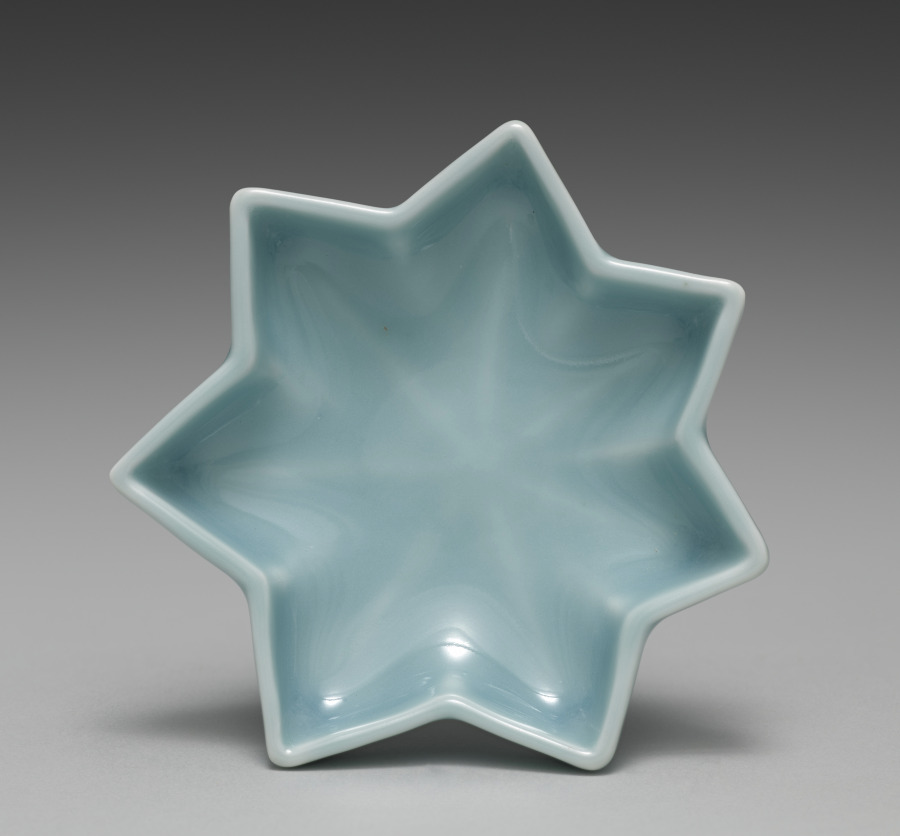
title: Saucer from Maple Leaf-Shaped Saucers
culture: Japan, Meiji period (1868–1912)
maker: Seifū Yohei III (Japanese, 1851–1914)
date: 1893–1914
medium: One of five dishes from a set of ten; porcelain with blue glaze and molded design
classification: Ceramic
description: These maple leaf–shaped saucers, like Yohei III's five shell saucers CMA 2022.188, have a long, horizontal box with a separate compartment for each piece. Now a set of five, these dishes were originally a set of ten, stored in two boxes of five each. From their housings, which accommodate differing numbers of objects, one can hypothesize that while some items created by the Seifu studio were intended to be acquired in larger sets, and thus were perhaps made to order, others, like these, may have been items to be purchased of the shelf in set quantities that allowed clients flexibility in scale. The box for these five saucers describes them as “heavenly blue[–glazed] porcelain” (tenseiji). The veins of the leaves are slightly raised in the clay so that the glaze pools around them and they stand out as white where the glaze thins. There are longer lines at the points of the leaves and shorter ones following the wall of each indentation so that the design has both a horizontal and a subtle vertical dimension.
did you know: Each leaf-shaped saucer in this set has a round foot.